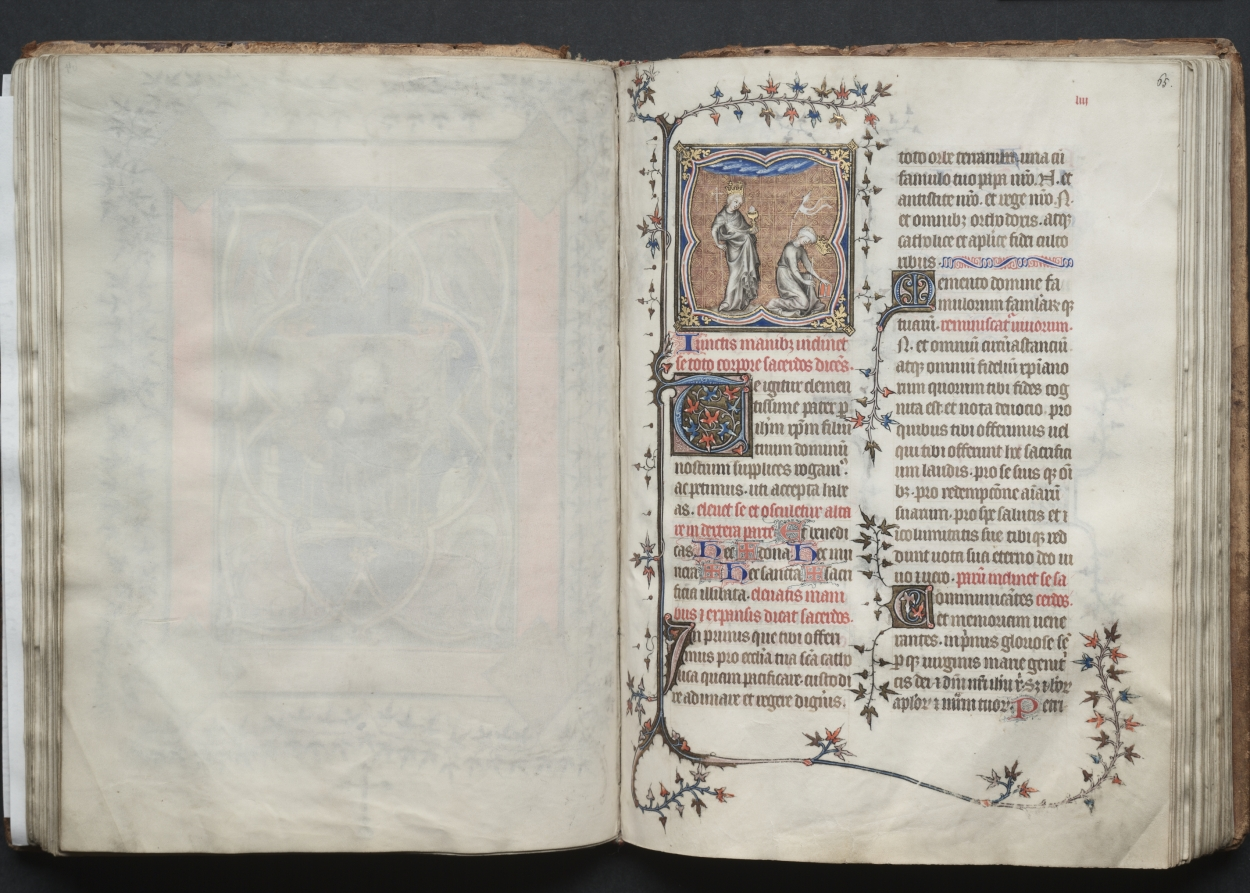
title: The Gotha Missal: Fol. 64v, Text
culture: France, Paris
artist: Master of the Boqueteaux (French)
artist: and Workshop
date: c. 1375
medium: ink, tempera, and gold on vellum; blind-tooled leather binding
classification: Bound Volume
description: The style and quality of this manuscript's decoration is typical of deluxe Parisian books made for aristocratic or royal patrons. Most of the book's decoration appears to be the work of the Master of the Boqueteaux, an artist active at the court of King Charles V (died 1380). His style was apparently shared by a number of book illuminators working in and around Paris. It is very possible that the Gotha Missal belonged to Charles V, but is not provable because the manuscript has no royal portraits and lacks a colophon. Given the book's magnificent decoration, however, it would seem that it was produced for a Valois prince, if not for the king himself. The manuscript receives its name from the German dukes of Gotha, its later owners.